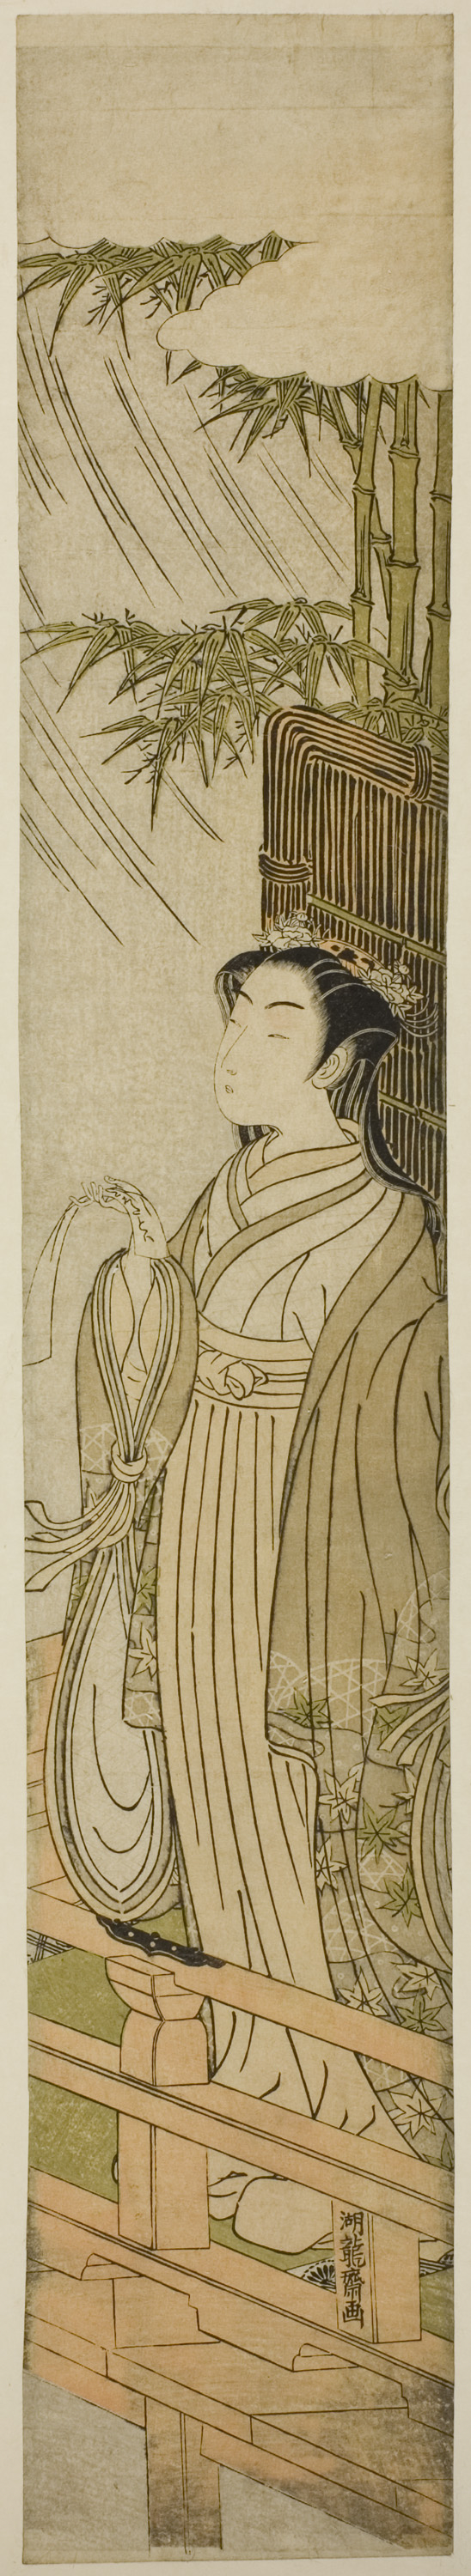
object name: Print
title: Ono no Komachi Praying for Rain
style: Japanese (culture or style)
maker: Isoda Koryusai (Japanese, 1735–1790)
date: Edo period (1615–1868), about 1771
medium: Color woodblock print, hashira-e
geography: Japan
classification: woodblock print; print; asian art